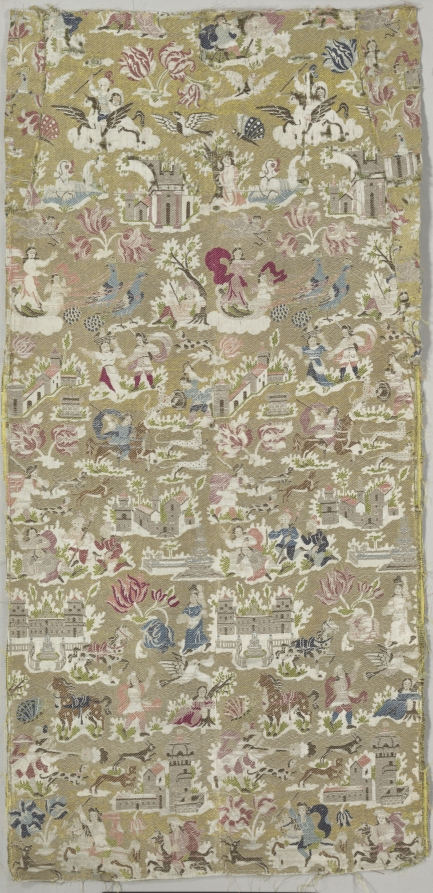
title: Gold Brocade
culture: Spain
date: 1600s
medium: silk and metal; brocade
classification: Textile